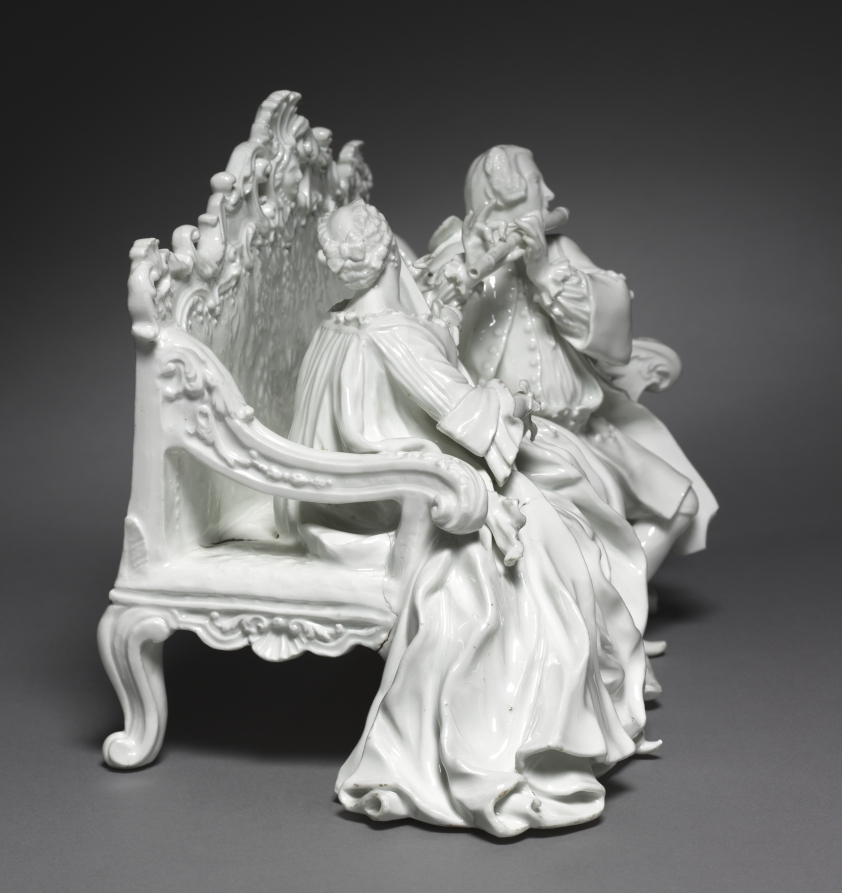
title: Figural Group: Musicians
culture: Germany, 18th century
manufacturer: Meissen Porcelain Factory (German, est. c. 1710)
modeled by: Johann Joachim Kändler (German, 1706–1768)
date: c. 1737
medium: porcelain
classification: Ceramic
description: An elegantly dressed couple accompany one another in a duet while seated on a tall-backed settee in this German porcelain figurine. The woman is likely playing a lute, an early form of the guitar, while the gentleman joins in with a wooden flute. Their music-making reflects their courtship and intimacy—a typical symbolic gesture rendered in such figural ceramic sculptures.